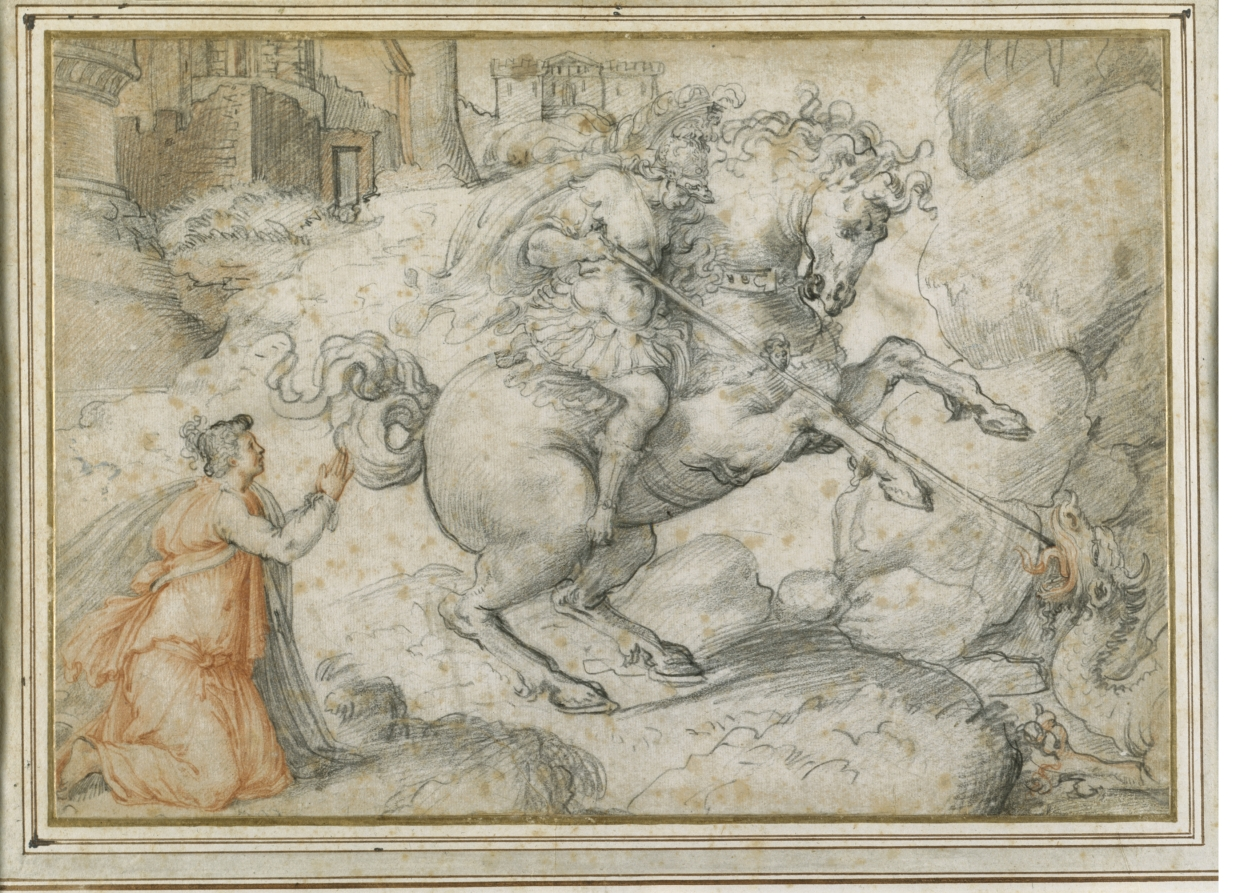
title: St. George and the Dragon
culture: Italy, 16th century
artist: Francesco Salviati (Italian, 1510–1563)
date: c. 1530s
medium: black chalk with red chalk, stumped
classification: Drawing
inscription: VERSO OF SECONDARY SUPPORT, upper center, in brown ink: C. Salviati ; upper left, in graphite: Box6 - 5. ; center, in graphite: 10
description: According to a legend based on Greek myth, as Saint George passed through Libya, he rescued a king’s daughter who had been left as a sacrifice to placate a vicious dragon. In gratitude for being delivered from the monster’s tyranny, the king’s subjects converted to Christianity. Here George wears armor in the ancient style based on Roman sculpture. Classical armor in Renaissance art was reserved for elite male subjects as a sign of their virtue. As a military saint, George’s attire conveys his antiquity as an early Christian hero (died about AD 303), conferring on him a sense of Roman authority and gravity.